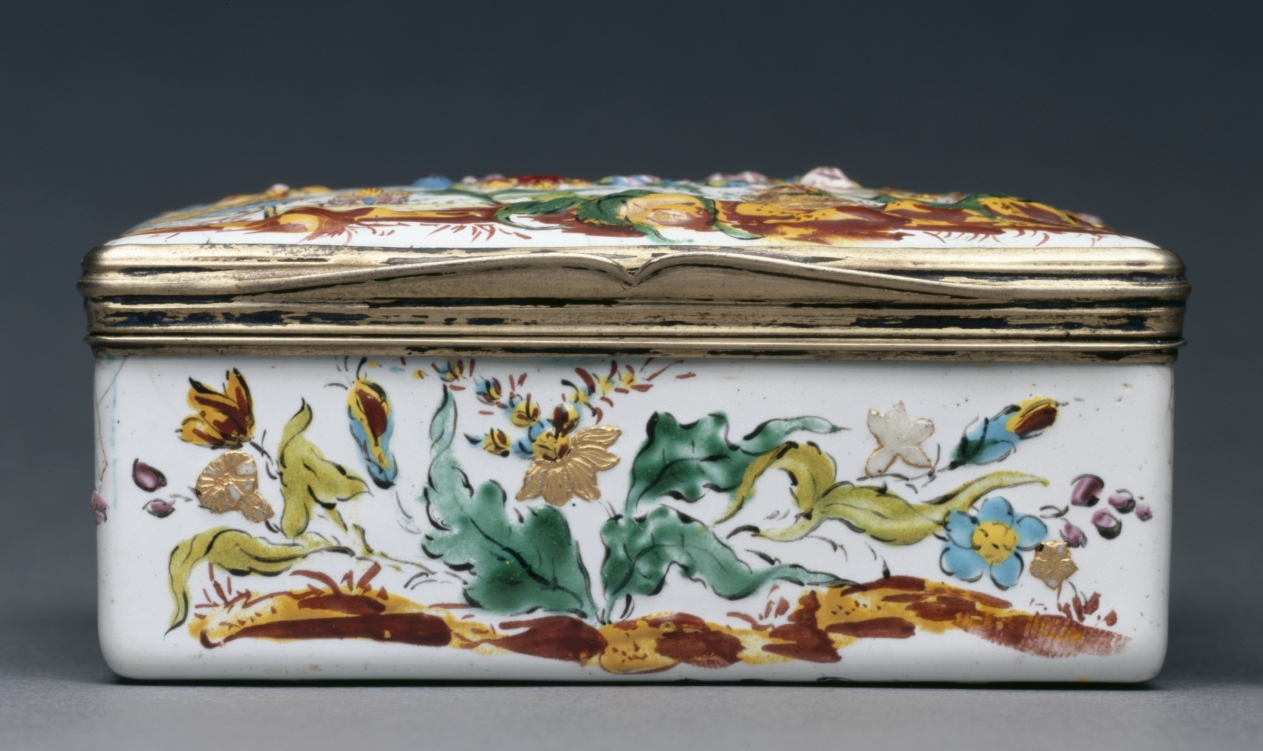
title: Box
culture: France, 18th century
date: 1749–50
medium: silver gilt and enamel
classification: Enamel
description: Chinoiserie in 18th-century France incorporated imitations of East Asian motifs, designs, and ornaments into European art. These imitations were often distorted by the European imagination and were not accurate representations of the cultures from which they drew inspiration. Elements of chinoiserie in this box can be seen primarily on the lid where enormous, vibrantly colored flowers tower over two crouching figures and a grouping of buildings.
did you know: The flower petals on the box lid are raised, an effect produced by drops of transparent enamel placed on the box’s surface that imitates polished gemstones or pearls.